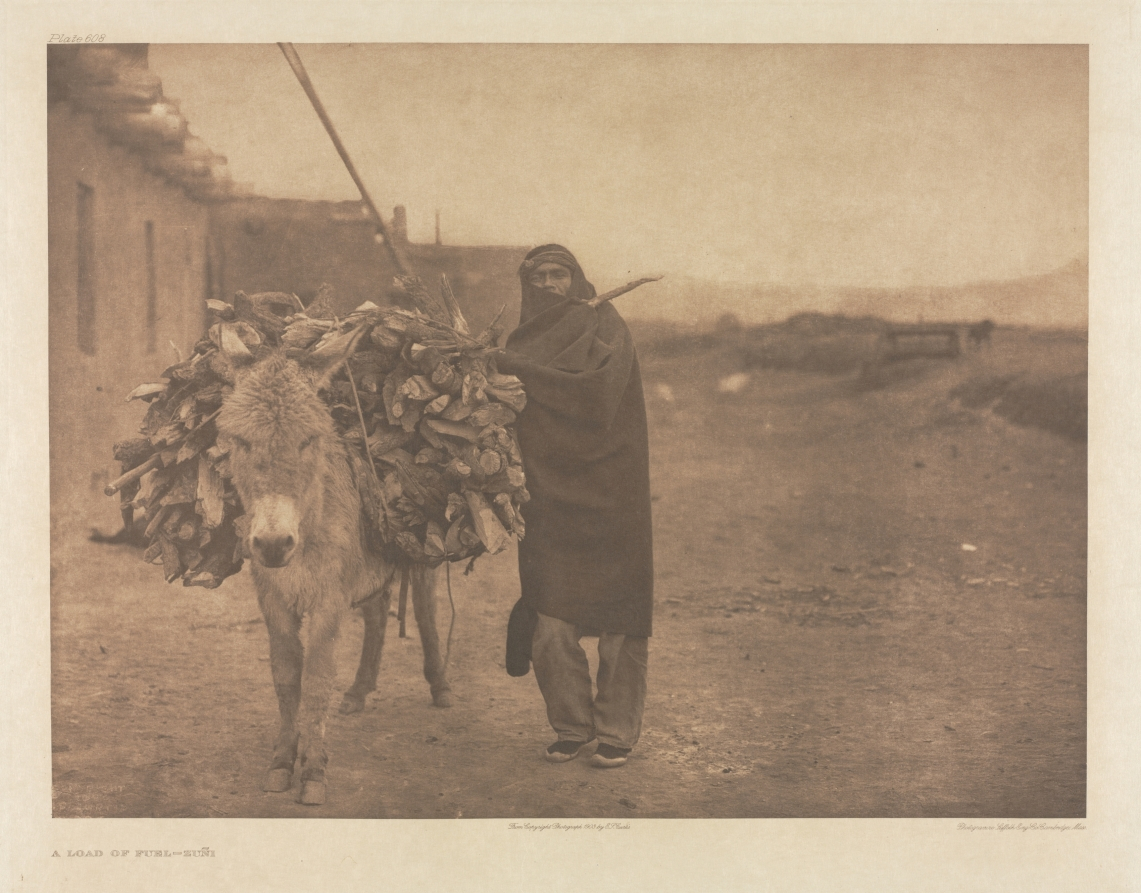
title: Portfolio XVII, Plate 608: A Load of Fuel - Zuñi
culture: America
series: The North American Indian: being a series of Portfolios picturing and describing the Indians of the United States, the Dominion of Canada, and Alaska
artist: Edward S. Curtis (American, 1868–1952)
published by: The University Press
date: 1903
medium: photogravure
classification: Portfolio